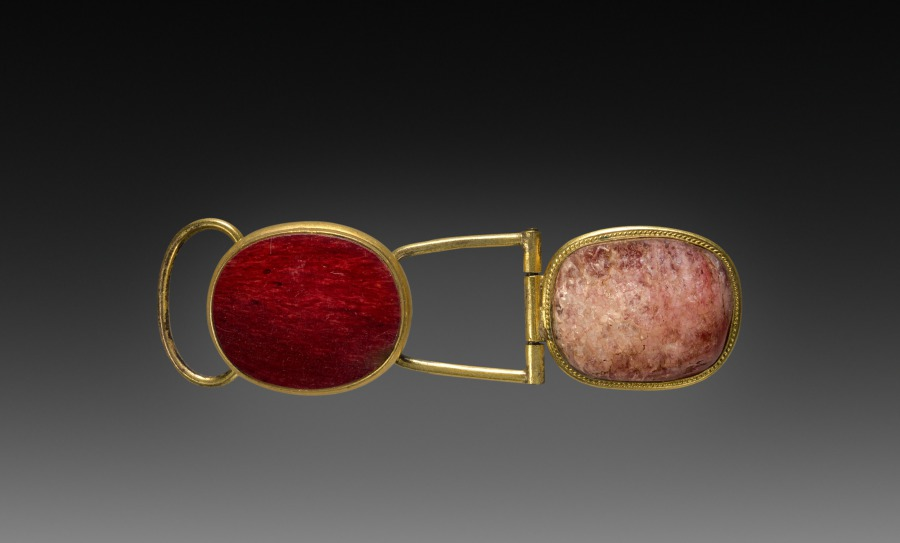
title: Buckle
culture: China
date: 1900s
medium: rose quartz and glass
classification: Jewelry